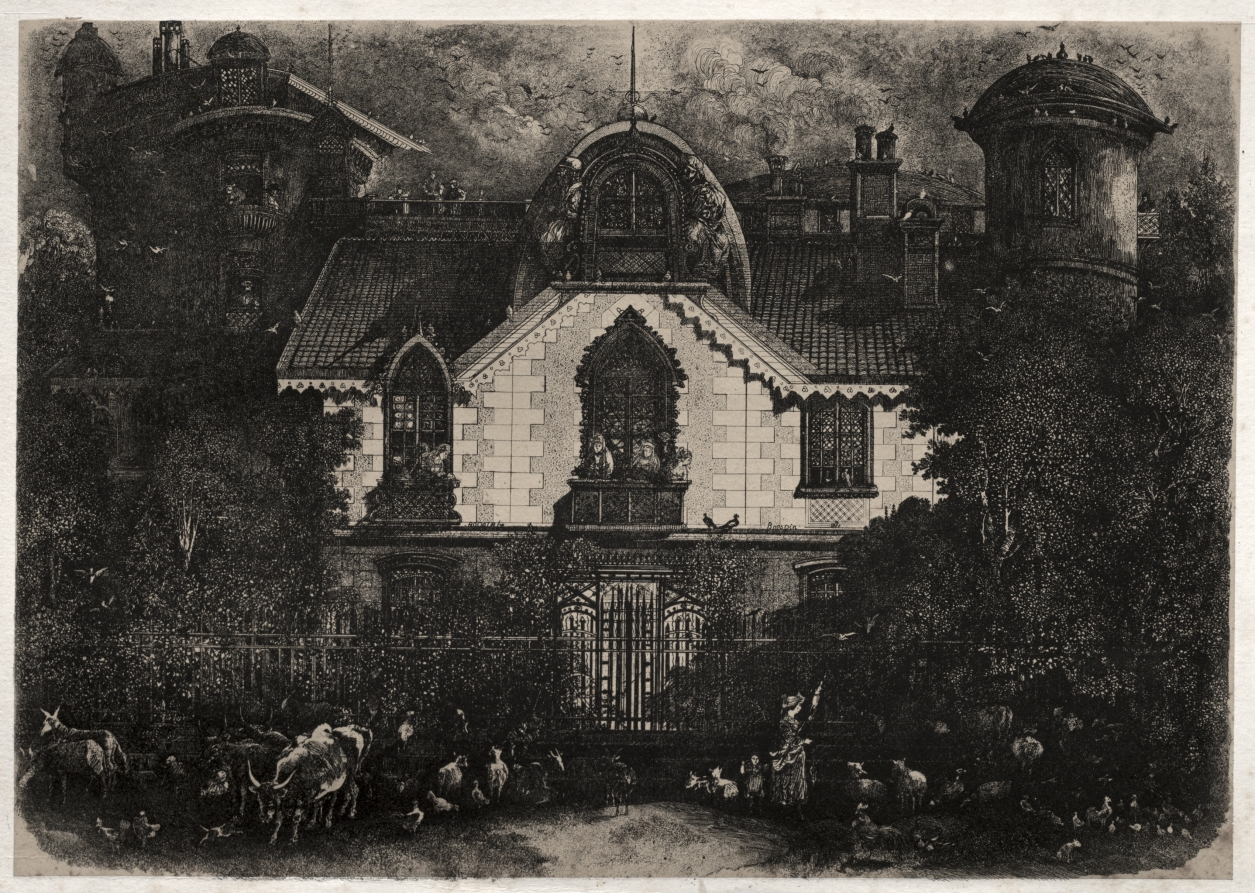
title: The Enchanted House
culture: France, 19th century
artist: Rodolphe Bresdin (French, 1822–1885)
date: 1871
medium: lithograph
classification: Print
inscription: center, in stone: Rodolphe Bresdin 1871